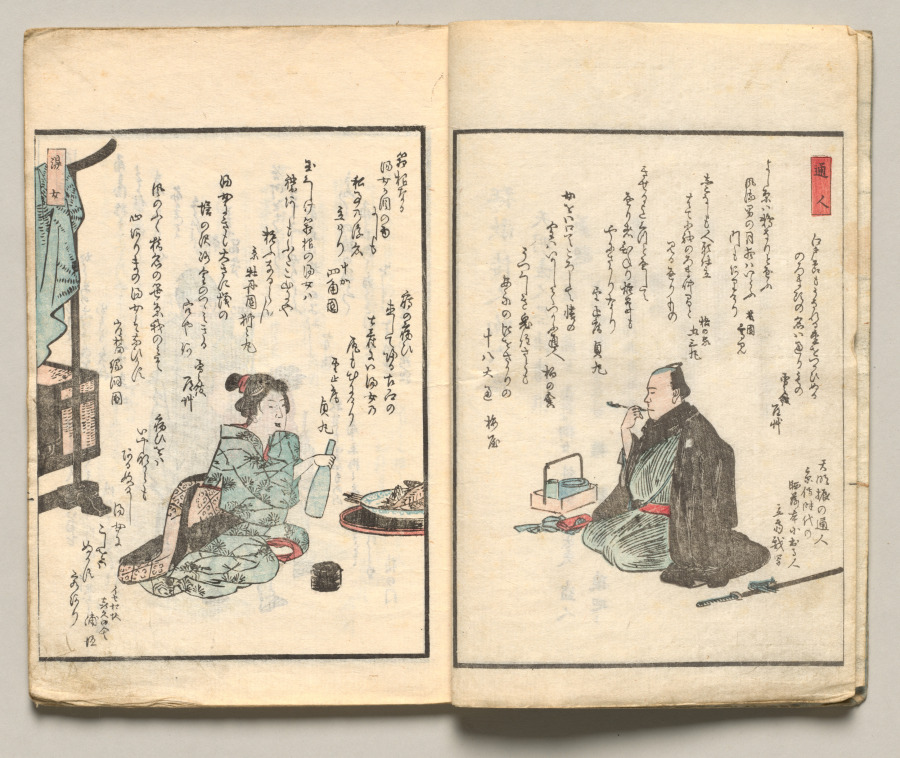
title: Spread Two from Volume Six of People of Japan in Light Verse (Kyōka)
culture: Japan, Edo period (1615–1868)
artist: Utagawa Hiroshige (Japanese, 1797–1858)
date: 1857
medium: Woodblock-printed book; ink and color on paper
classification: Bound Volume